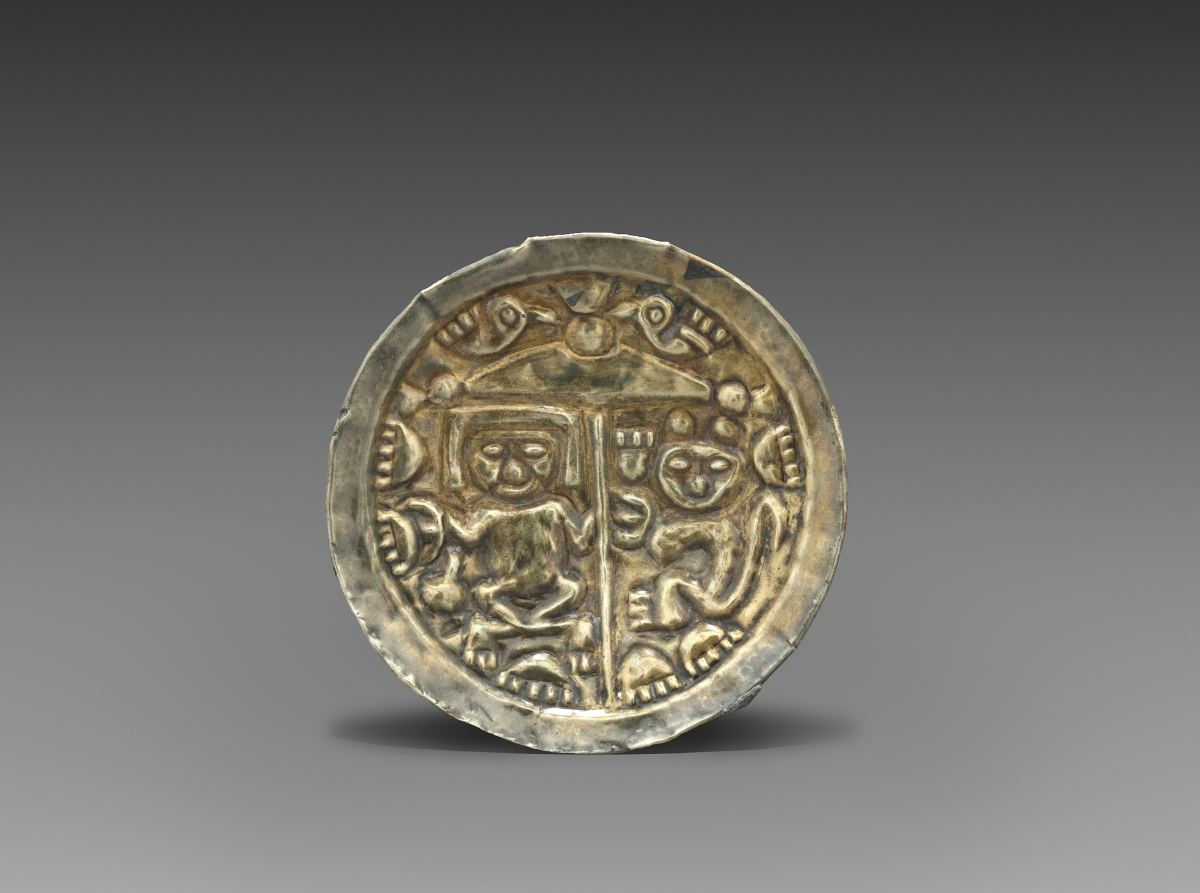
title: Ear Ornament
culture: Peru, North Coast, Sicán, 9th-14th Century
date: c. 800–1370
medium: hammered and embossed gold alloy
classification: Metalwork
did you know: Wearing large ear ornaments, a privilege of the nobility, permanently stretched the earlobes.